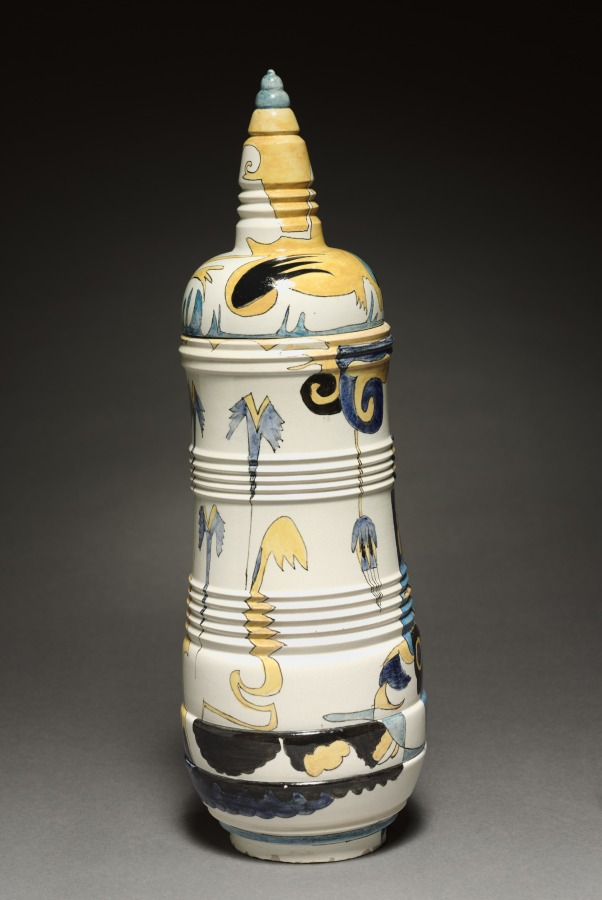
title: Covered Jar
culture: Netherlands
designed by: Theodorus A. C. Colenbrander (Dutch, 1841–1930)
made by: Rozenburg Factory (Netherlandish)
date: 1885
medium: earthenware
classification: Ceramic